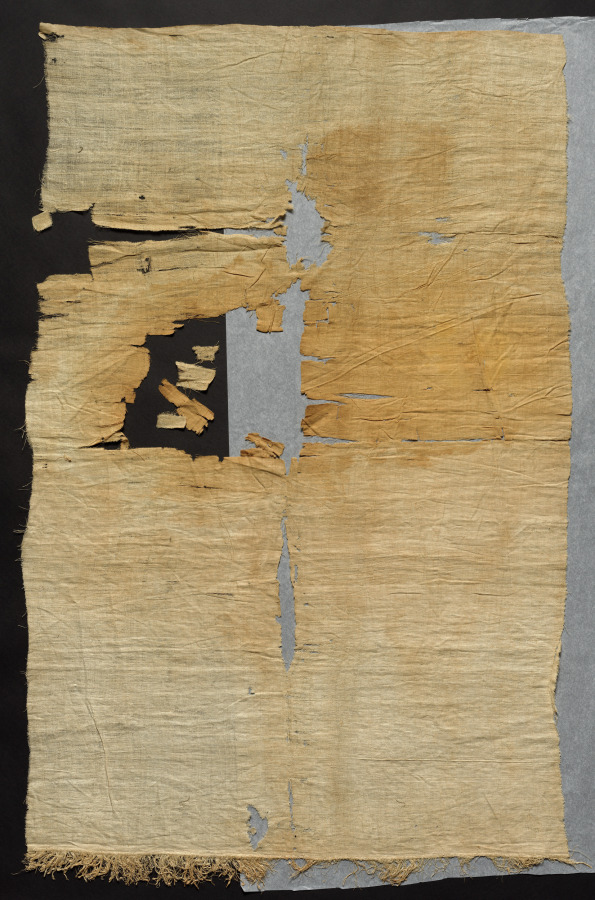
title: Mummy Linen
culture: Egypt, New Kingdom (1540–1069 BCE), Dynasty 18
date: 1550–1291 BCE?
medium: plain weave: linen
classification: Textile